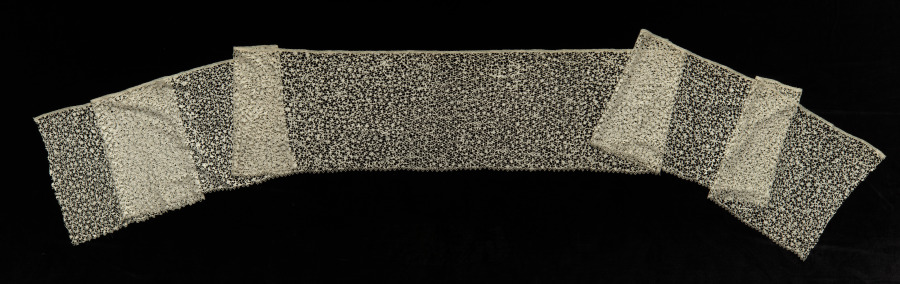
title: Lace Flounce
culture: Italy, Venice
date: 1640–60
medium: Needle lace (coralline point)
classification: Lace